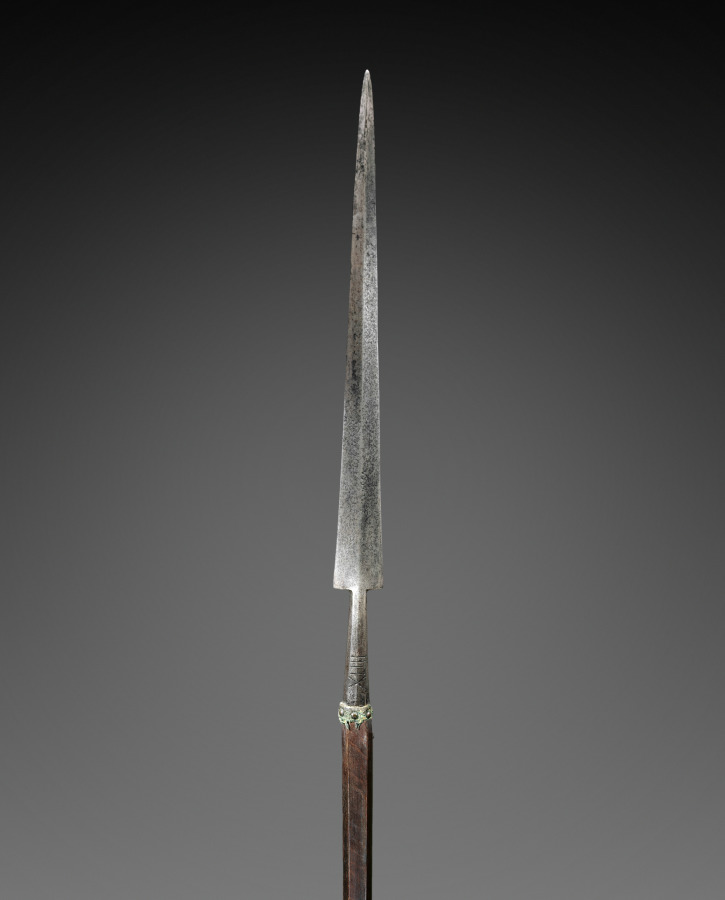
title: Partisan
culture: Italy, early 17th Century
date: c. 1600–1620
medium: steel; rectangular wood haft with planed corners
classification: Arms and Armor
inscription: on blade: Lucca; on socket: XIII